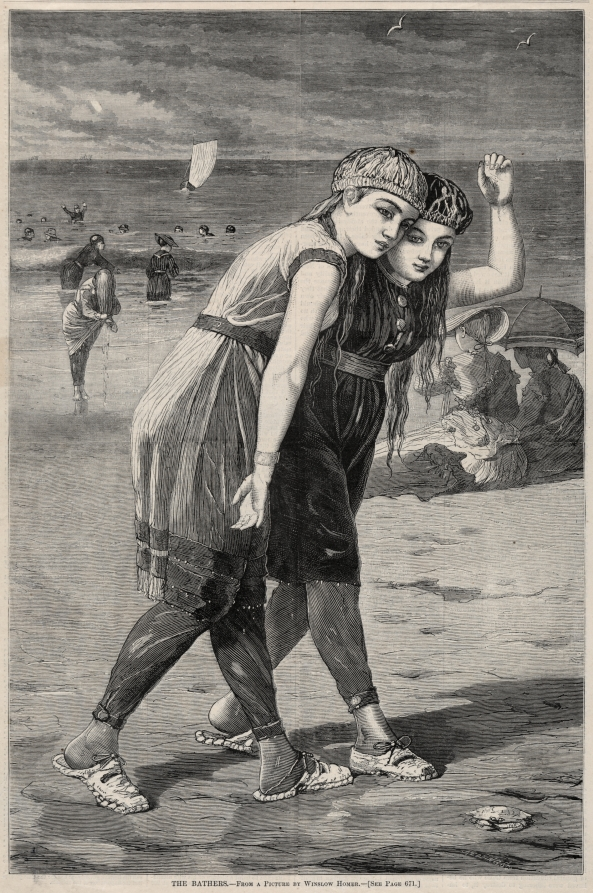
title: The Bathers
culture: America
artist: Winslow Homer (American, 1836–1910)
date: 1873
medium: wood engraving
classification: Print